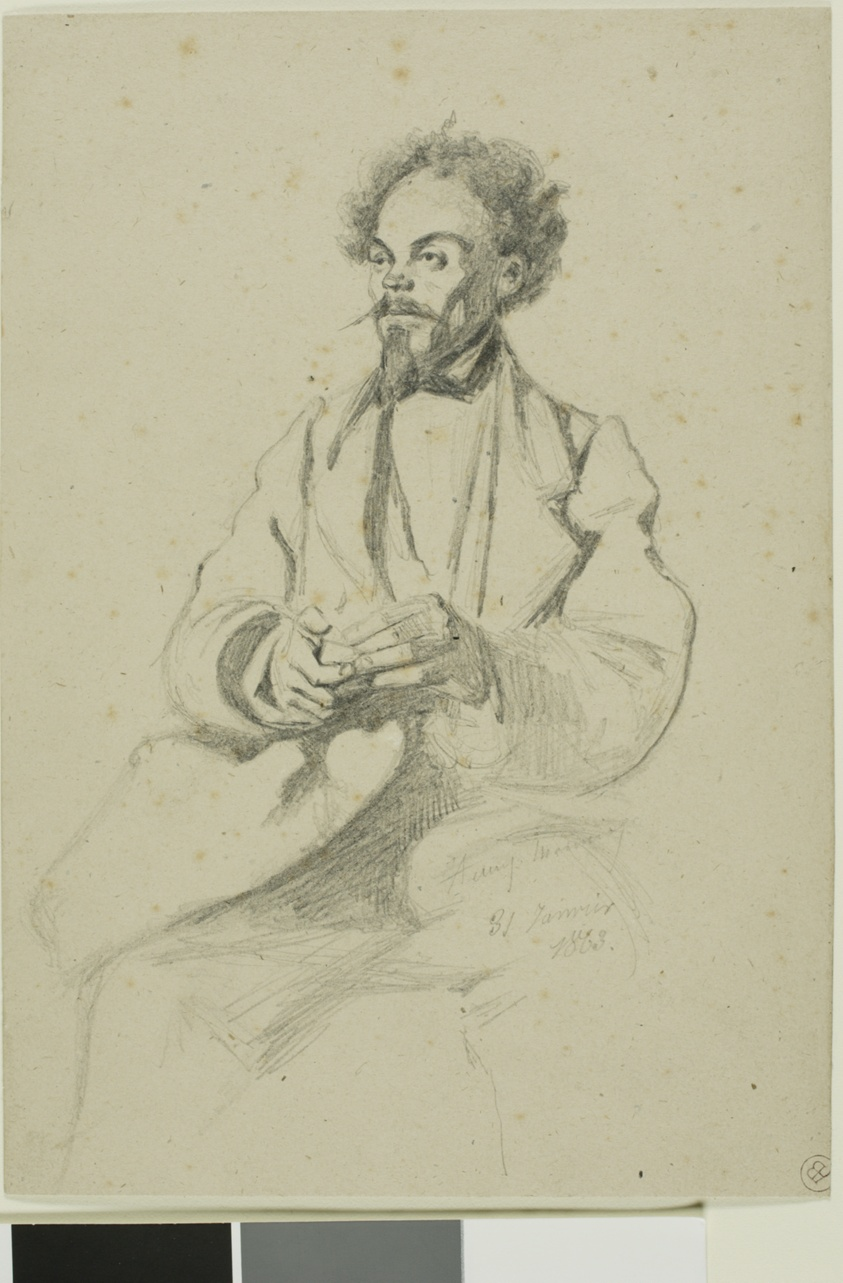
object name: Drawing and Watercolor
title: Portrait of Charles Meryon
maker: Henri Monnier (French, 1799/1805–1877)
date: 1863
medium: Graphite on buff wove card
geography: France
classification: graphite; drawings (visual works); prints and drawing